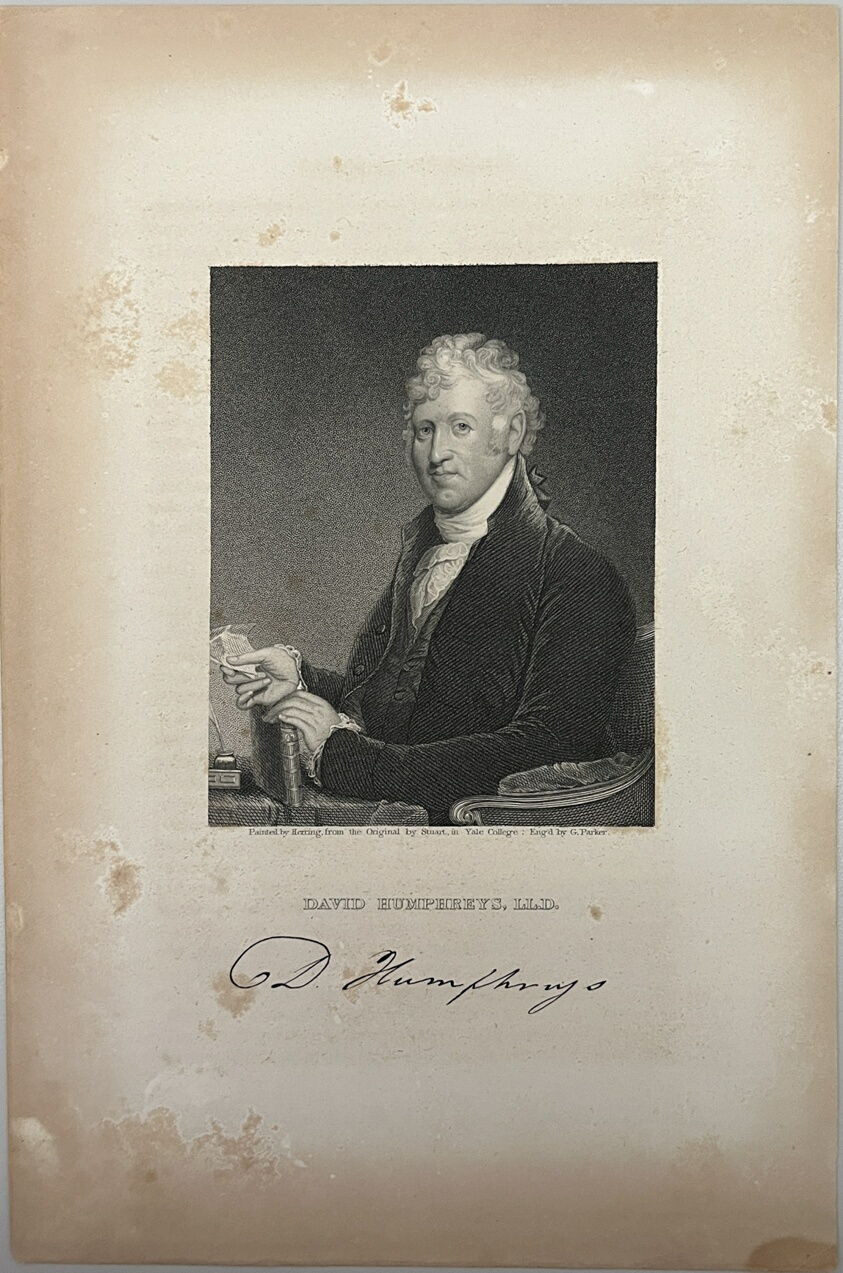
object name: Print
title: David Humphreys, LL.D.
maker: George Parker (English, active in America, active 1834-1868); after James Herring (American, 1794-1867); after Gilbert Stuart (American, 1755-1828)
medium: Stipple engraving on paper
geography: England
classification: reproduction; print; prints and drawing